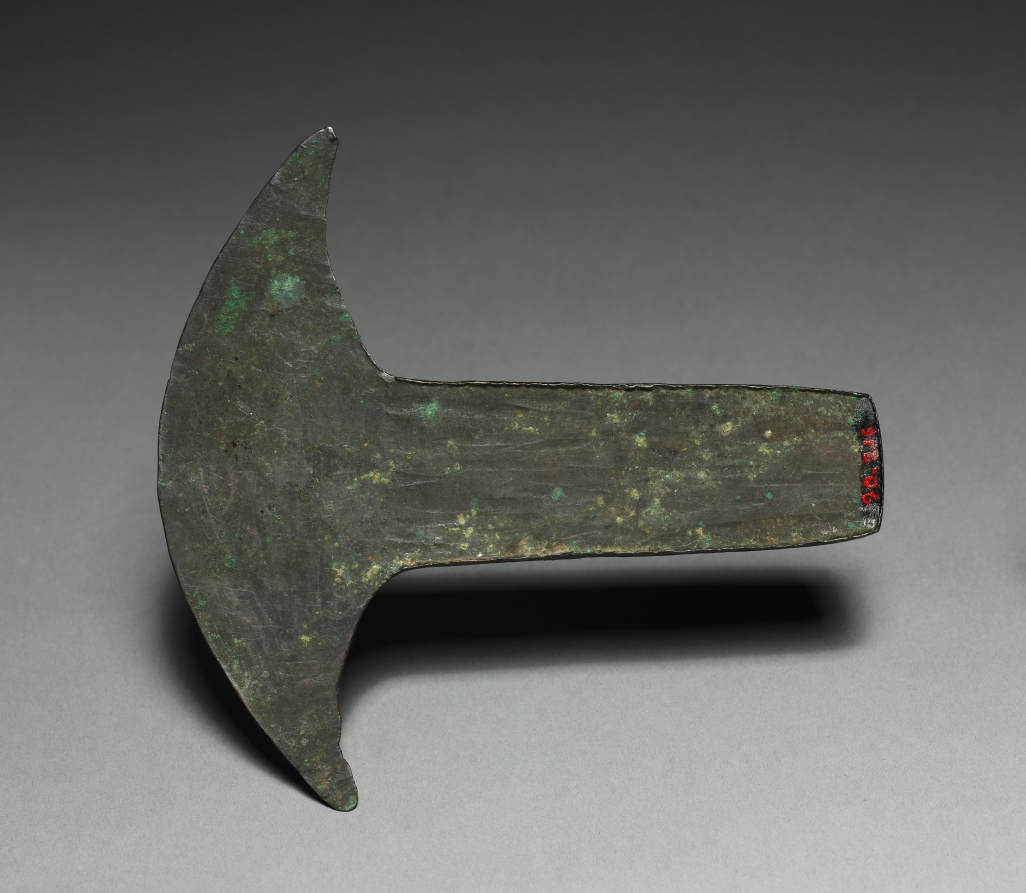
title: Axe-shaped Implement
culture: Mexico, Oaxaca, Mixtec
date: 1200–1519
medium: cast and hammered copper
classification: Metalwork